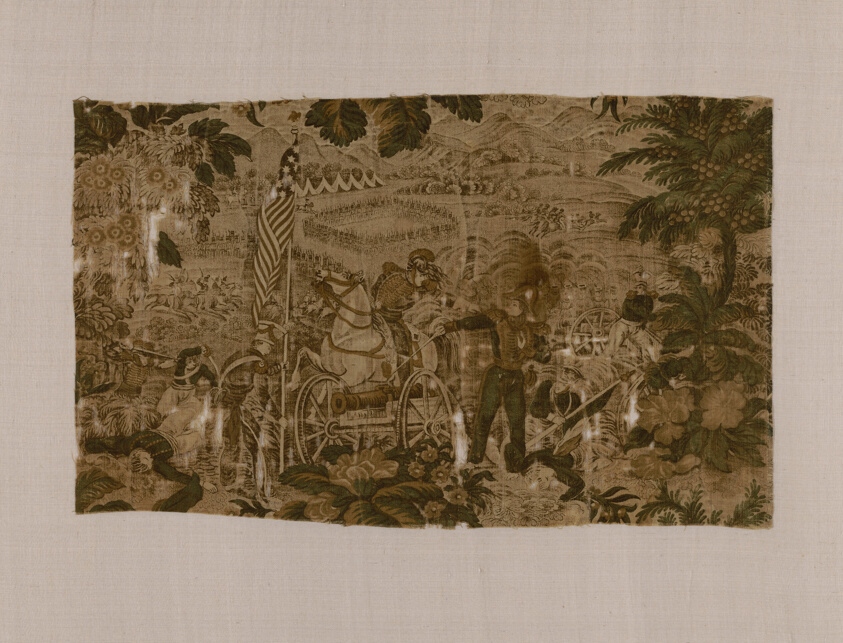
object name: Textile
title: Panel (Furnishing Fabric)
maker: United States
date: 1848/50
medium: Cotton, plain weave; roller and engraved roller printed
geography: United States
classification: textile; weaving - printed; furnishing textile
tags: propaganda